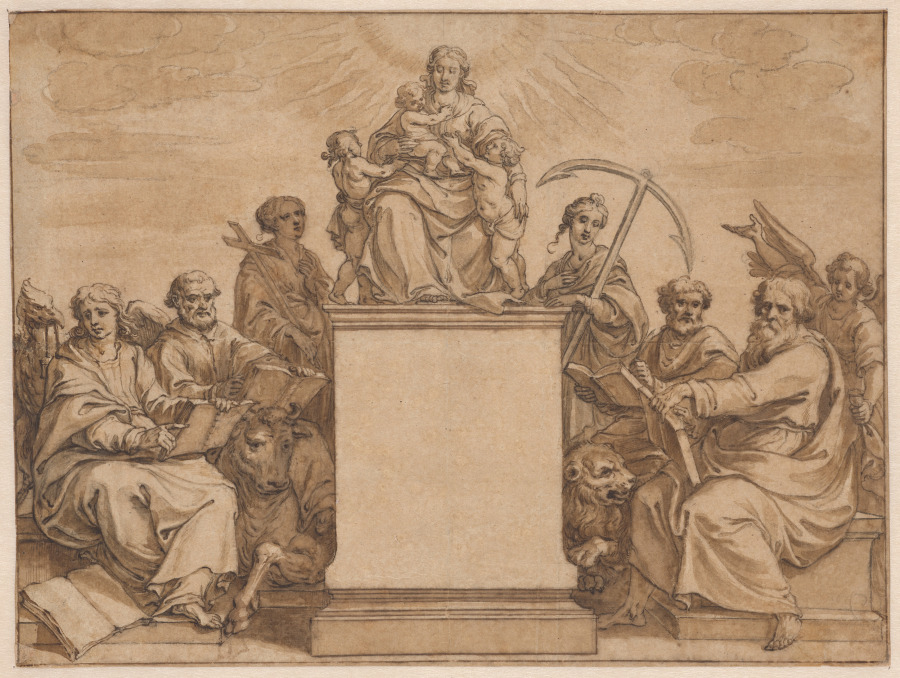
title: The Three Theological Virtures: Faith, Hope, and Charity, Surrounded by the Four Evangelists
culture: Netherlands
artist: Pieter I de Jode (Flemish, 1570–1634)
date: before 1634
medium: Pen and ink, brush and wash over chalk with indications of transfer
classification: Drawing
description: This drawing is a design for a frontispiece, or title page, for the 1639 edition of the Theatrum Biblicum, a pictorial Bible compiled from print series by various artists illustrating the Old and New Testaments. Pieter De Jode the Elder’s monumental figural types depict the three theological virtues: Charity, atop a blank plinth, Hope, on the right, and Faith, on the left, bordered by the four Apostles with their attributes. The plinth was kept blank in order to be filled in with the title of the book (in this case, the New Testament), in the printed version. De Jode spent his career making and publishing prints primarily for the Antwerp book trade, which flourished during the late 16th and 17th centuries.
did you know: In the period, the virtue of Charity, also described as Love, seen here seated atop the plinth, was usually portrayed as a woman tending to three children.